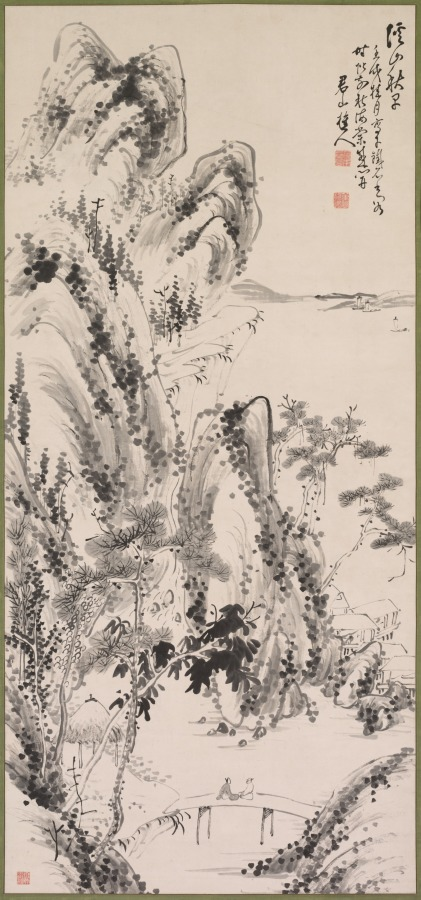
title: Landscape with Figures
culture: Japan, Edo period (1615–1868)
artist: Fujimoto Tesseki (Japanese, 1816–1863)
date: c. 1840–63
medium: hanging scroll; ink and color on paper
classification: Painting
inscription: Artist's inscription and two seals in upper right. A third seal in lower left.